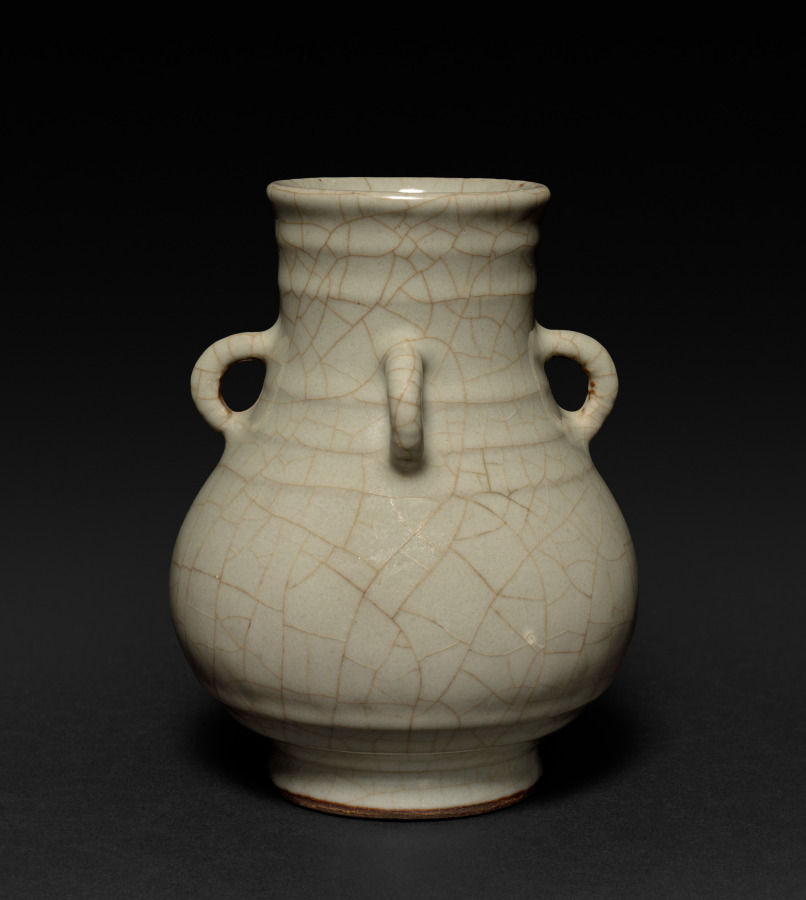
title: Vase: Guan type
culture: China, Qing dynasty (1644-1911)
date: 1700s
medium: porcelain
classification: Ceramic